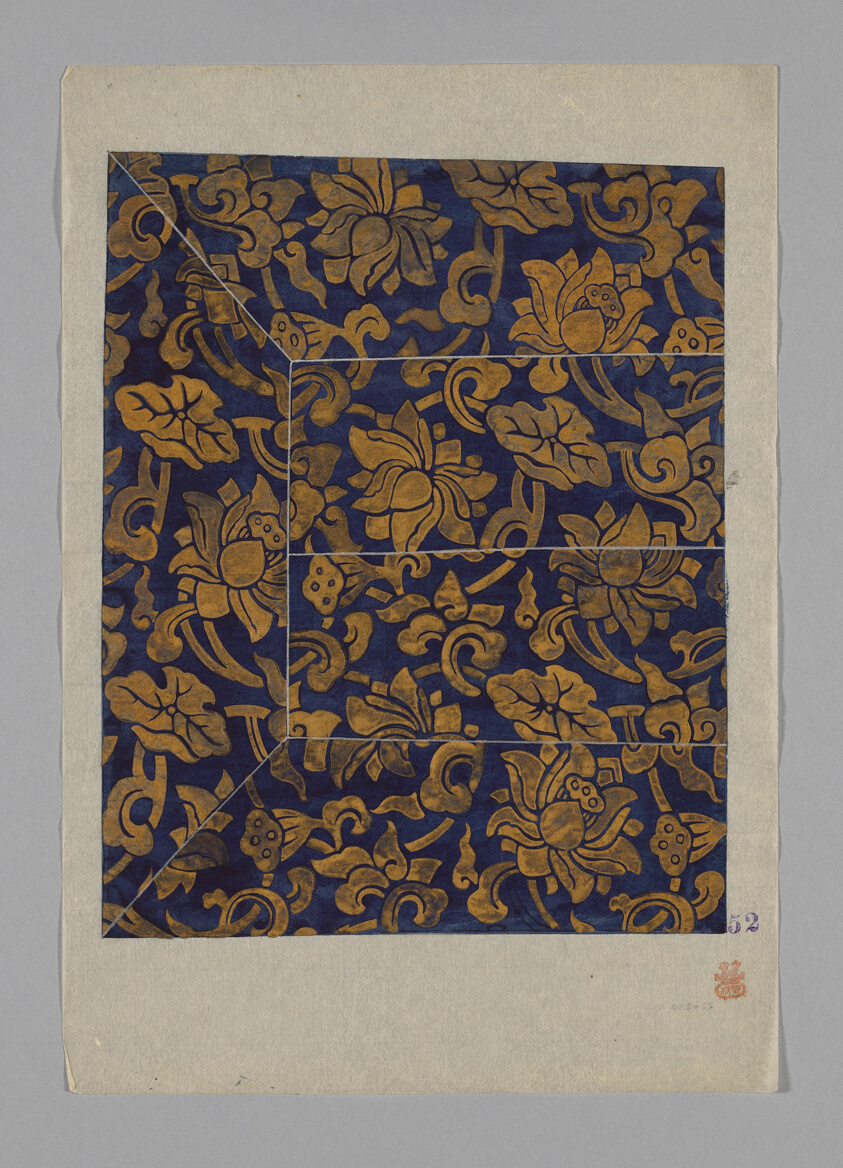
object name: Drawing and Watercolor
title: Design on Paper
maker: Japan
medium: Paper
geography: Japan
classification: textile; accessory - paper design; watercolor; paper